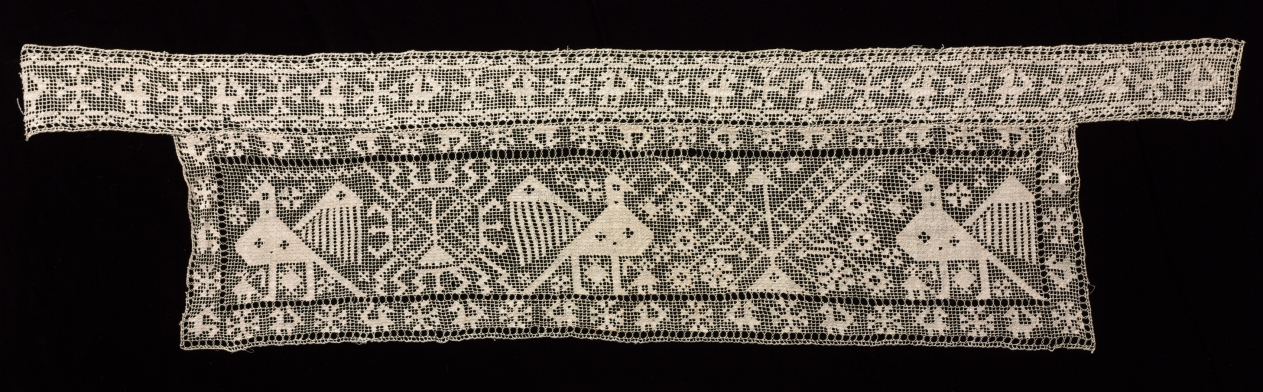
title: Panel with Birds, Flowers, and Suns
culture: Italy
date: 1500s–1600s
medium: Bleached linen (est.): needle lace, filet/lacis (knotted ground and darned in two directions)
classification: Lace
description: The repeated sun and cross motifs, representing Christ and the Crucifixion, suggest this lace panel may have been used to ornament a Christian vestment, perhaps worn by a clergy member.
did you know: Based on the ancient belief that the peacock’s flesh never decayed, they became a symbol of immortality.